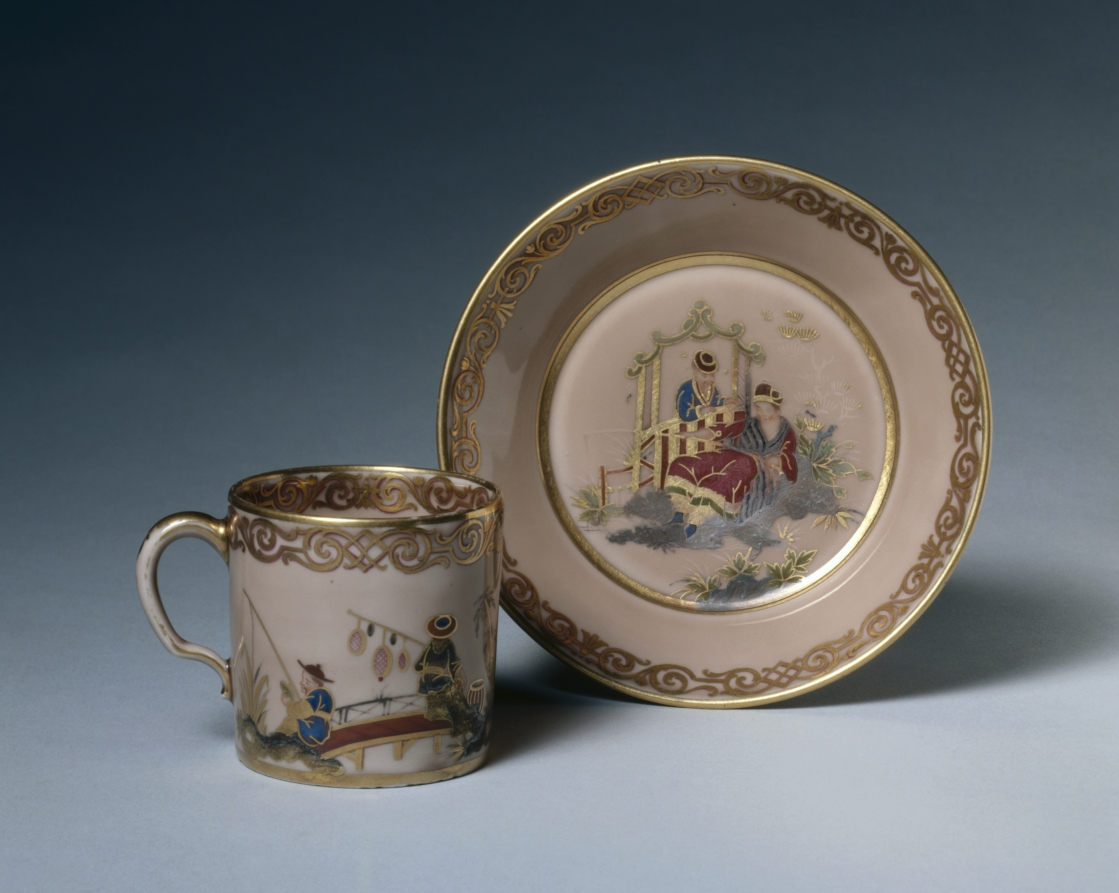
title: Cup and Saucer (Gobelet litron et soucoupe)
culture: France, Sèvres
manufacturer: Sèvres Porcelain Factory (French, est. 1756)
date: 1778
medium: hard-paste porcelain with overglaze enamel decoration and gilt and silver decoration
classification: Ceramic